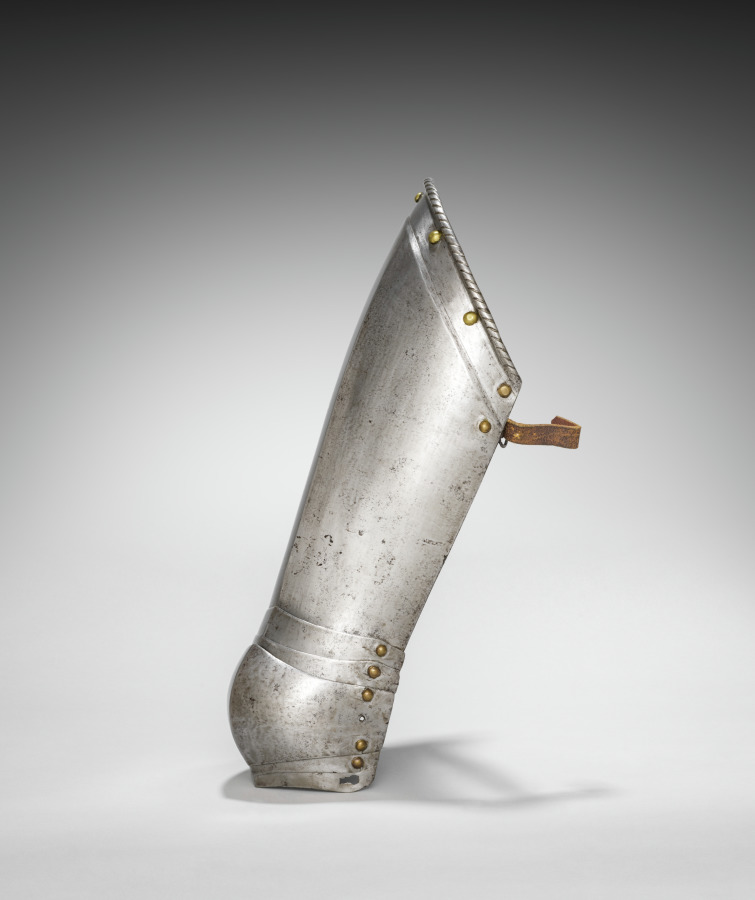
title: Proper Right Cuisse and Knee Cop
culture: South Germany, 16th century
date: c. 1560–1580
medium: steel, leather straps, brass rivets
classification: Arms and Armor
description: This armor was developed for the joust-a sporting combat between two mounted contestants. Although all of the elements of this armor date from the same period, they are not all from the same suit. This armor is thus called "composed." It also shows the asymmetry of jousting armor. The participants rode along a wall-like barrier known as a "tilt" with their left sides facing one another. Consequently, armor on that side of the body had to be thicker. Note the large plate (grandguard) over the left shoulder for extra protection. Also, the breathing holes in the helmet were placed on the right side (farthest from an opponent's lance) to avoid injuries from splinters. The bracket attached to the right breastplate is called the lance-rest, a shock-absorbing support designed to accommodate the lance when "couched" under the right armpit.